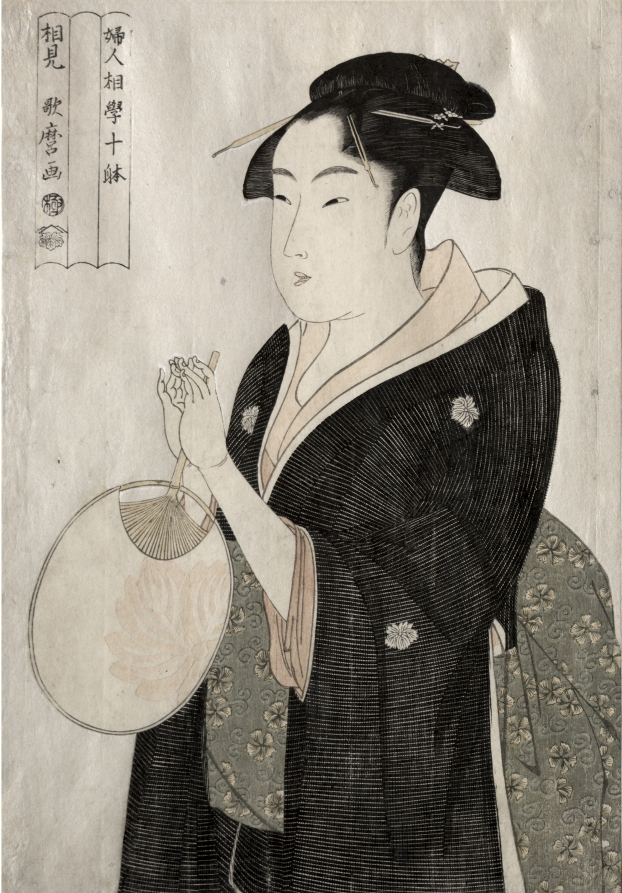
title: Woman Holding a Fan (from the series Ten Aspects of the Physiognomy of Women)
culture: Japan, Edo period (1615–1868)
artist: Kitagawa Utamaro (Japanese, c. 1754–1806)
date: c. 1793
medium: color woodblock print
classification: Print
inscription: Signature: Sōmi Utamaro ga (Utamaro, the physiognomist).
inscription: Publisher: Tsutaya Jūzaburo (emblem). Censorship Seal: kiwame.